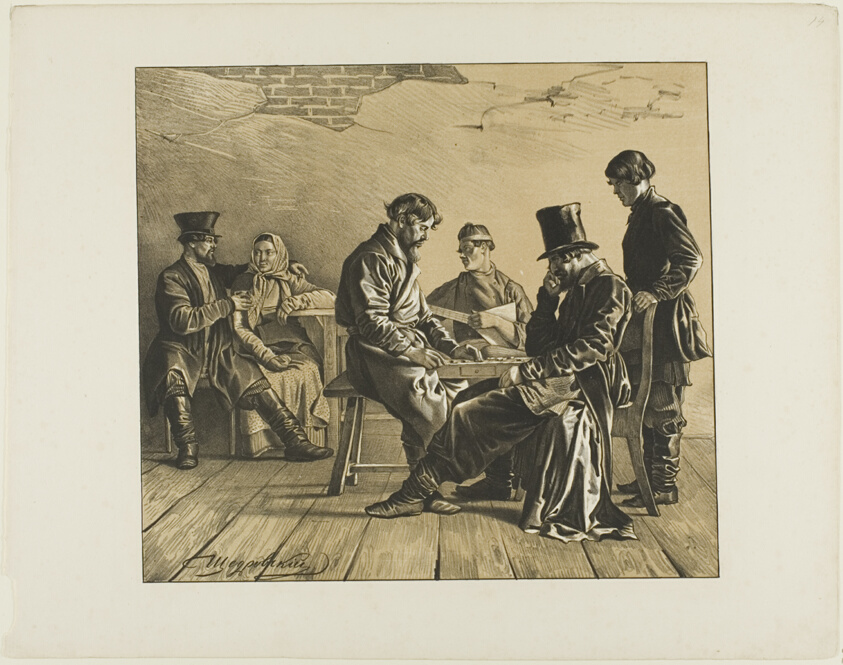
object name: Print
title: Scenes from Russian Folk Life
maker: Ignatii Stepanovich Shchedrovskii (Russian, 1815-1870)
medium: Color lithograph on paper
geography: Russia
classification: lithograph; print; prints and drawing